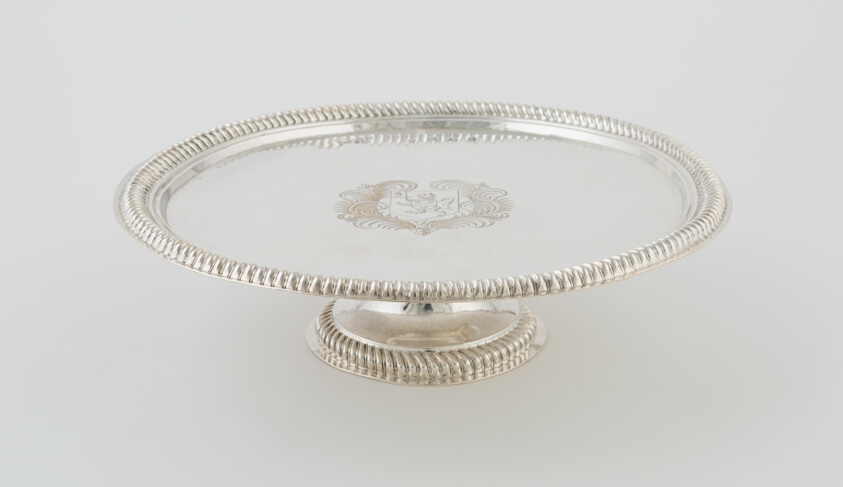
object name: Metalwork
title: Tazza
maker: Joseph Ward; English, active 1680-1726; London, England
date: 1697/98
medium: Silver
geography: London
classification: silver; metalwork; european decorative arts